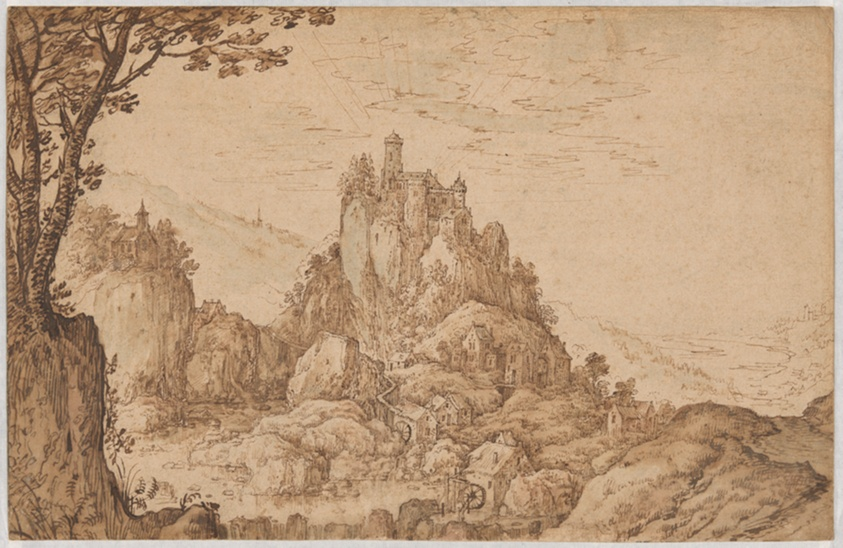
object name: Drawing and Watercolor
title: A Castle on a Crag in a Mountainous Landscape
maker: Joos de Momper; Flemish, 1564–1635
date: late 1590s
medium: Pen and brown ink, with brush and brown ink wash and touches of black ink wash, over traces of black chalk, on cream laid paper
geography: Flanders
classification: pen and ink drawings; prints and drawing; paper